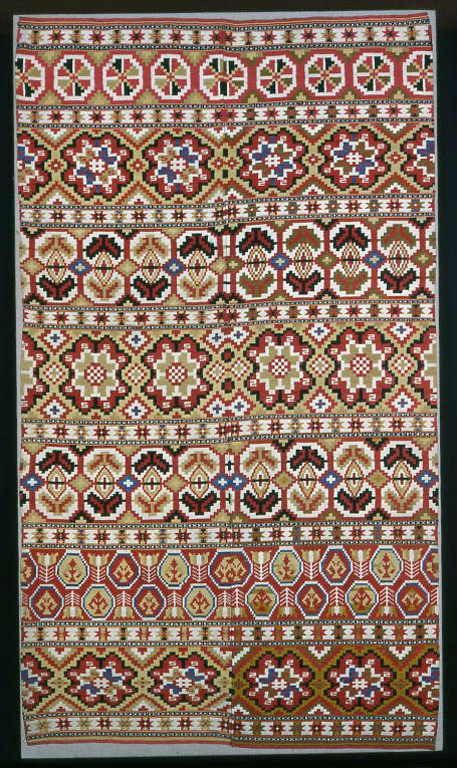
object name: Textile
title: Panel (Furnishing Fabric)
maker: Sweden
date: 19th century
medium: Linen and wool, interlocking tapestry weave; with simple alternating float weave in weft stripes; two widths joined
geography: Sweden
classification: textile; weaving; furnishing textile